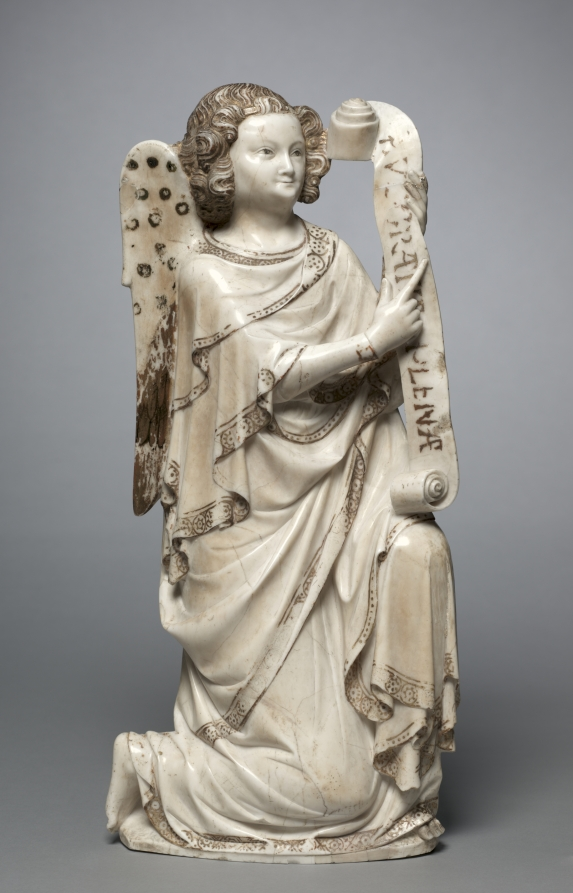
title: The Archangel Gabriel from an Annunciation Group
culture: France, Champagne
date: c. 1350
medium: alabaster with traces of paint and gilding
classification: Sculpture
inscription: Ave Maria, Gratia Plena.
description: In France, the use of alabaster began in the late 1200s for funerary monuments. The Archangel Gabriel, together with its counterpart, the Virgin Mary (now in the Louvre Museum, Paris) is part of an Annunciation. This is a rare example of alabaster sculpture from the 1300s. The alabaster comes from a quarry near Malaucène in Provence (France), making it an instance of long-distance trade of the rare material. Although the figure is very flat, it was likely made to also be viewed from the back, where there are remnants of gilding and the peacock feathers of the angel’s wing.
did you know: The surface of alabaster works can vary. By differentiating the intensity of polishing, it is possible for sculptures to create a surface with varying degrees of luster, or shine.